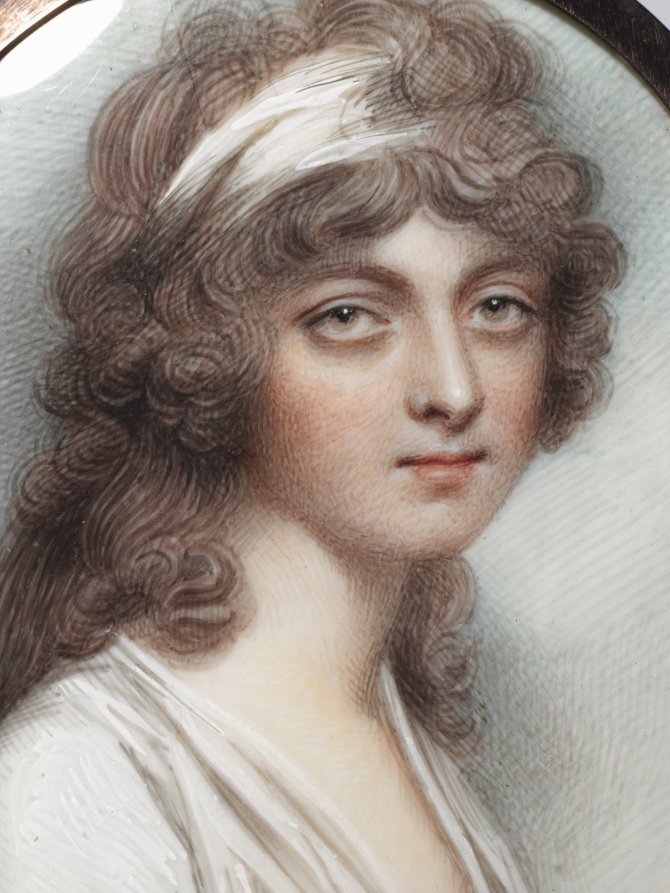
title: Portrait of Anna Walmesley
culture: England, 18th century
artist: Andrew Plimer (British, 1763–1837)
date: 1795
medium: watercolor on ivory in a gold frame with hair reverse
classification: Portrait Miniature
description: Sons of a clockmaker, Nathaniel Plimer and his younger brother Andrew initially trained in their father's profession, although they grew restless with this trade, and ran off to live with Gypsies for two years. By 1781, they were together in London, and determined to practice art. Both took up residence with established artists. Nathaniel worked as a servant to the enamelist Henry Bone, and Andrew became the valet to the portrait and miniature painter Richard Cosway. Cosway discovered Andrew copying one of his miniatures and introduced him to miniature painting. Andrew assimilated his master's airy execution and adapted Cosway's linear brushwork that leaves much of the bare ivory visible. He also employed Cosway's use of large, expressive eyes that made his miniatures appear soulfully elegant, earning him high praise among legions of admirers. A quick study, Andrew set up his own studio by 1786 and he exhibited regularly at the Royal Academy of Arts from 1786–1830. Andrew Plimer's works fall into two phases. In the first, his sitters appear more naturalistically rendered than those painted after around 1789. During the earlier period he frequently included his initials, "A.P.," on the front of the miniature, followed by a date. By contrast, he did not sign or date works in the second phase. Furthermore, in Andrew's second phase of work, he reduced his palette and, perhaps due to his high output, sitters share many visual characteristics; in particular, his women have elongated necks, long noses, and large appealing eyes.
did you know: Engraved on the top of the frame is the name Anna Walmesley, but because this was a common name, the museum has yet to discover any information about the sitter or to confirm her identity.